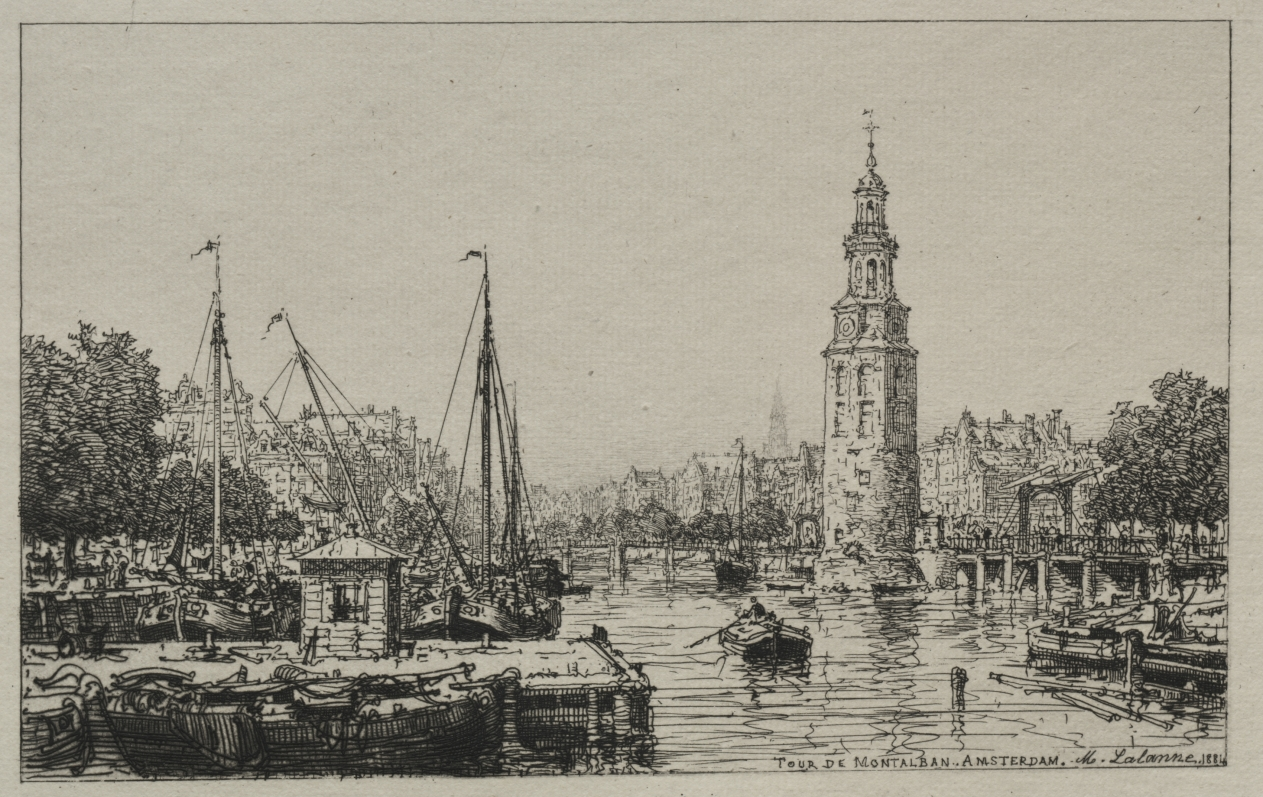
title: Tour de Montelban, Amsterdam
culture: France, 19th century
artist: Maxime Lalanne (French, 1827–1886)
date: 1884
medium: etching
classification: Print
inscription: signed, titled, and dated in the plate